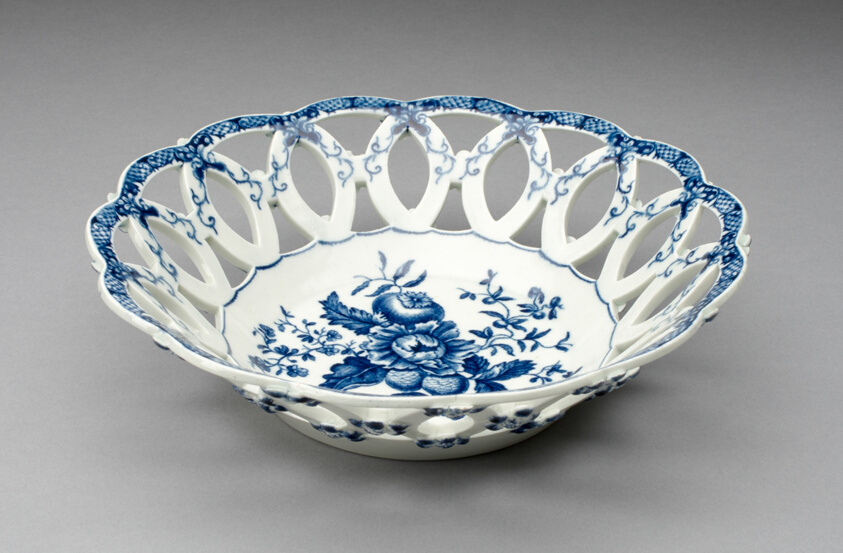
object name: Ceramics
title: Basket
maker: Worcester Porcelain Factory (Warmstry House Period, 1751–1783); Worcester, England, founded 1751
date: c. 1770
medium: Soft-paste porcelain with underglaze blue decoration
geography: Worcester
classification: tableware; porcelain; european decorative arts; ceramics